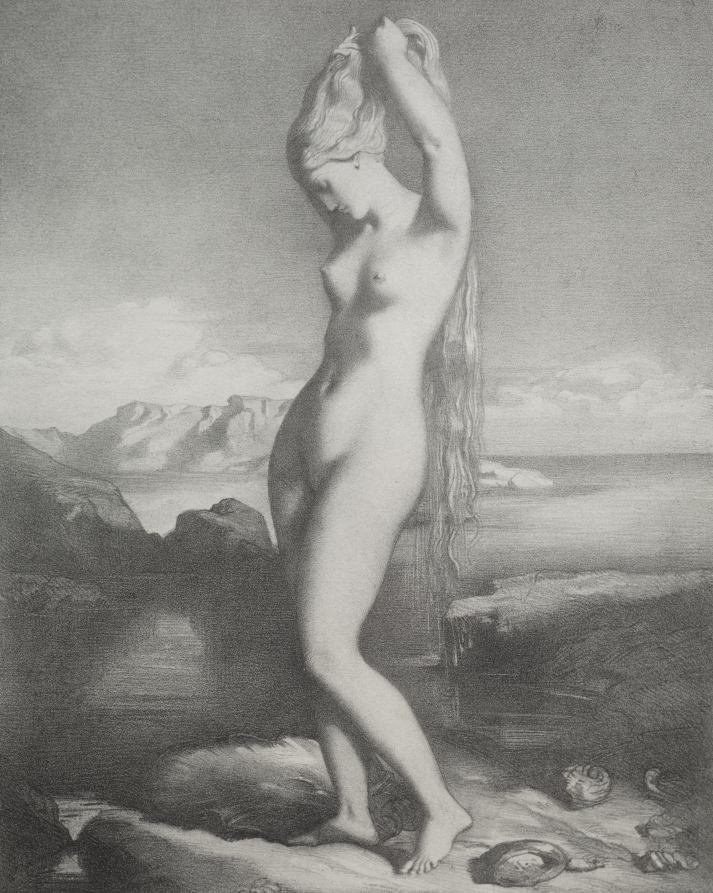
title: Venus Anadyomène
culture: France, 19th century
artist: Théodore Chassériau (French, 1819–1856)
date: 1839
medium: lithograph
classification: Print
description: Ingres and Théodore Chassériau executed these lithographs to reproduce and publicize important pictures they had previously painted. However, the lithographs also represent experimentation with an unfamiliar medium, but both artists' assured draftsmanship make the prints successful.